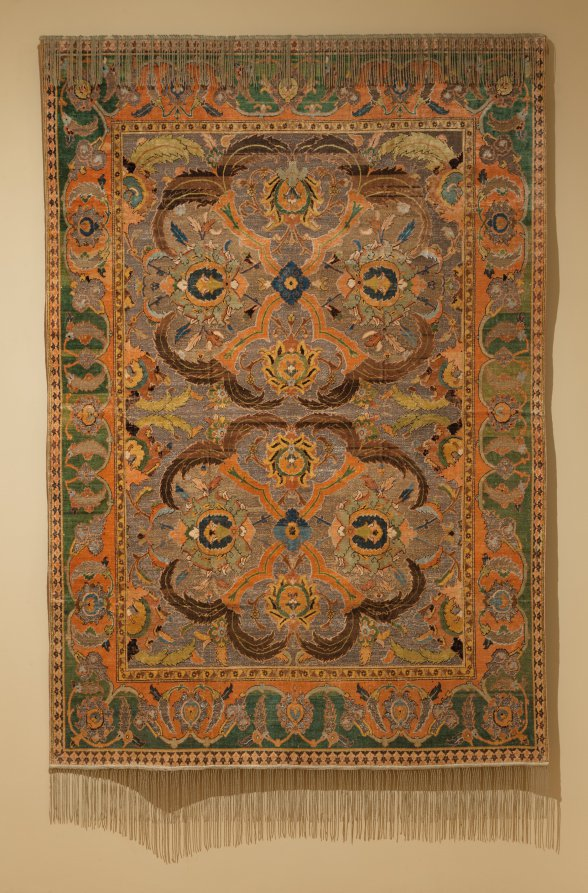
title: Royal Carpet with Silk and Metal Thread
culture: Iran, Isfahan, Safavid period (1501-1722)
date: 1600–1625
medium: Cotton: warp; cotton and silk: wefts; silk: pile, asymmetrical knot; gilt- and silver-metal thread: brocaded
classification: Carpet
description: The Safavid dynasty was the greatest dynasty from Iran in the Islamic period. Similarly, woven textiles and carpets from this period are some of the best produced in the region. Royal workshops produced luxurious textiles, like this one, to furnish the royal court. Expertly woven silks were highly prized by the Iranian elite but were also produced for export to the European aristocracy.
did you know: 16th- and 17th-century Iranian carpets with silk and metal thread were mistakenly called "Polish," based on one displayed in the Polish exhibit at the Paris World Fair in 1878.